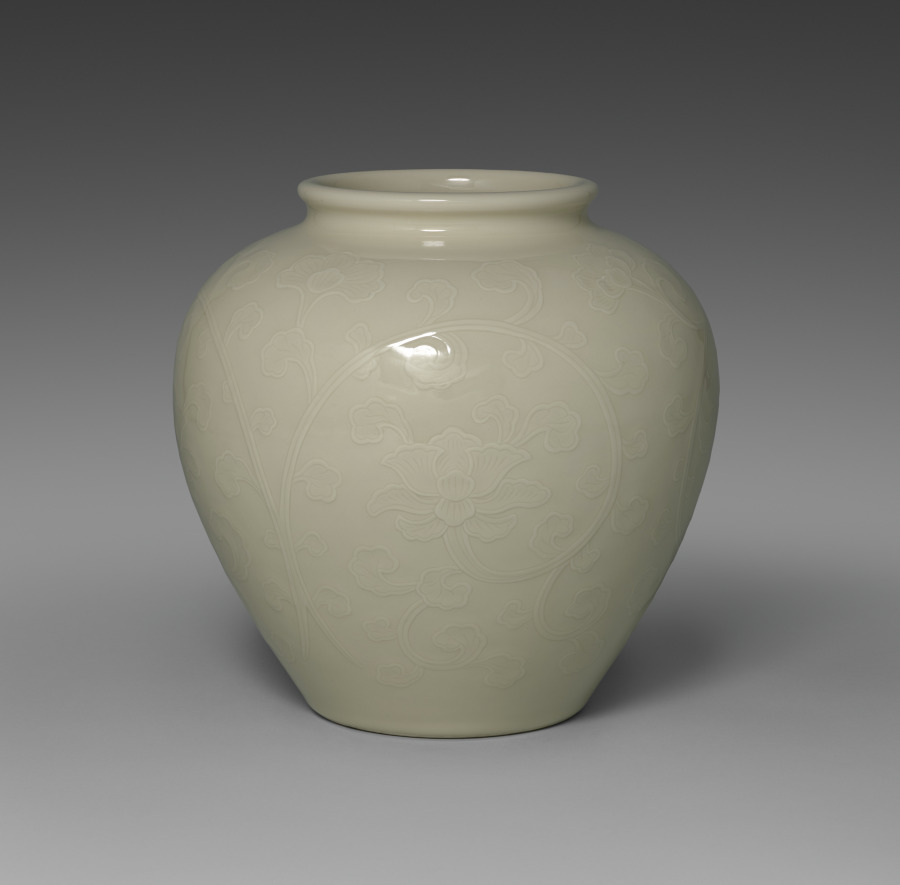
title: Guan-Shaped Vessel with Floral Scroll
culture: Japan, Taishō period (1912–26) or Shōwa period (1926–89)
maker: Seifū Yohei IV (Japanese, 1872–1951)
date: 1914–46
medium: Porcelain with molded and carved design and cream glaze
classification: Ceramic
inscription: 清風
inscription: 清風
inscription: 清風造之 【印】成山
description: Many of the vases created by Yohei III and IV were made with reference to and in emulation of Chinese ceramics in both form and glazing. The Seifu studio was inspired by later Chinese copies of two other archaic vessel types, the hu (Japanese ko) and guan (Japanese kan). In simple terms, in their original contexts, the hu and guan were storage jars that also appeared in ritual contexts. This hefty guan-shaped vase by Yohei IV has a floral scrolling pattern known in Japanese as karakusa, or “Chinese grasses.” The flowers are generally identified as lotus or peony. This flower vase might alternately be categorized as having the form of what is called a shukaiko in Japan, or a large vessel for holding wine. Shukaiko were created as early as the latter part of the Kamakura period after Yuan dynasty examples.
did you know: According to the box lid, the vase is a kanpakuji, "bright-jewel white porcelain," work.